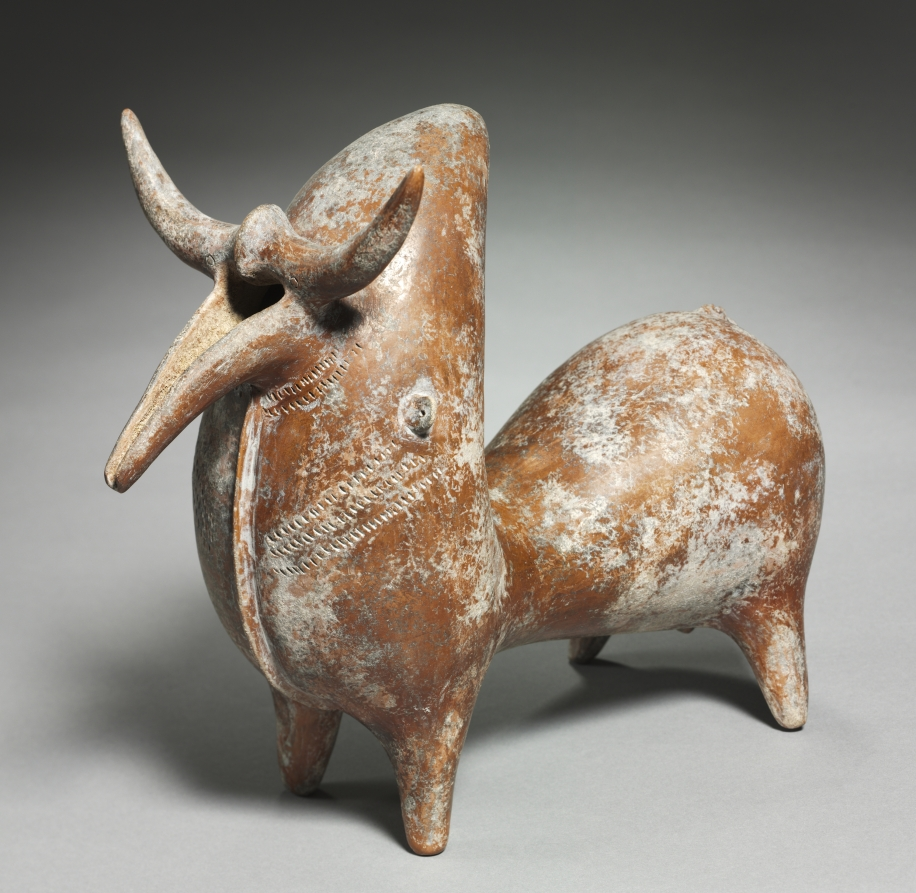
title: Spouted Zebu Vessel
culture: Iran, Marlik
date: c. 1000 BCE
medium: earthenware, burnished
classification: Ceramic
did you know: A zebu, sometimes known as humped cattle, is a species of domestic cattle originating in South Asia.